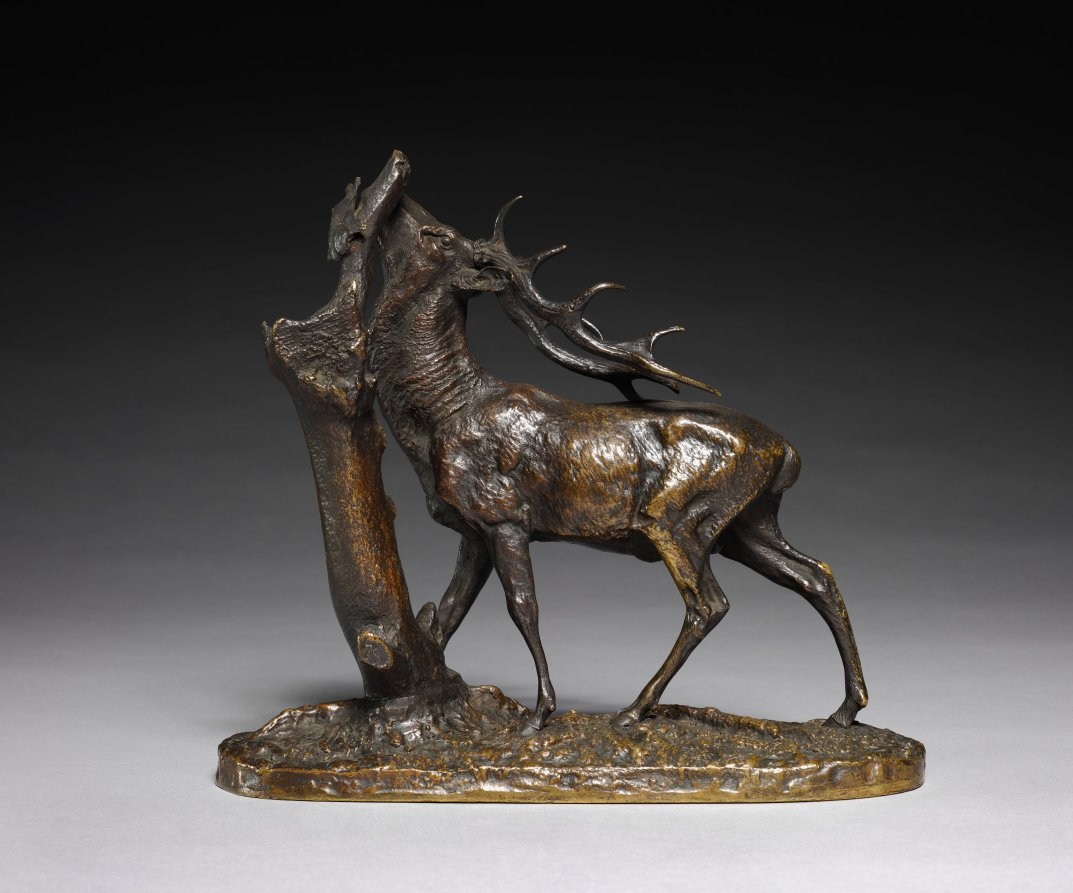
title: Stag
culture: France, 19th century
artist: Pierre Jules Mène (French, 1810–1879)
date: c. 1825 – 1879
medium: bronze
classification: Sculpture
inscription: Signed: "P. J. Mene"